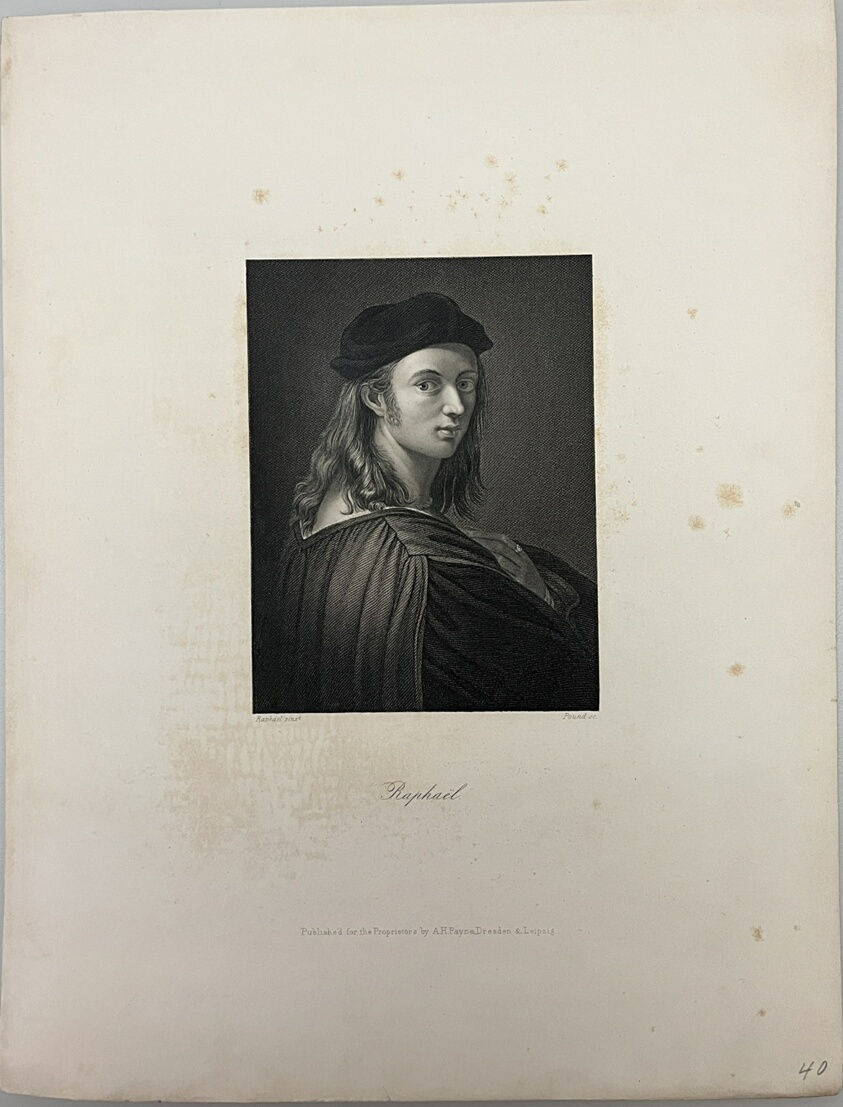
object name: Print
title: Raphaël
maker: D.J. Pound (British, active c. 1860); published by Albert Henry Payne (English, active in Germany, 1812-1902); after Raphael (Italian, 1483-1520)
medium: Stipple etching and etching on paper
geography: United Kingdom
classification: reproduction; print; prints and drawing